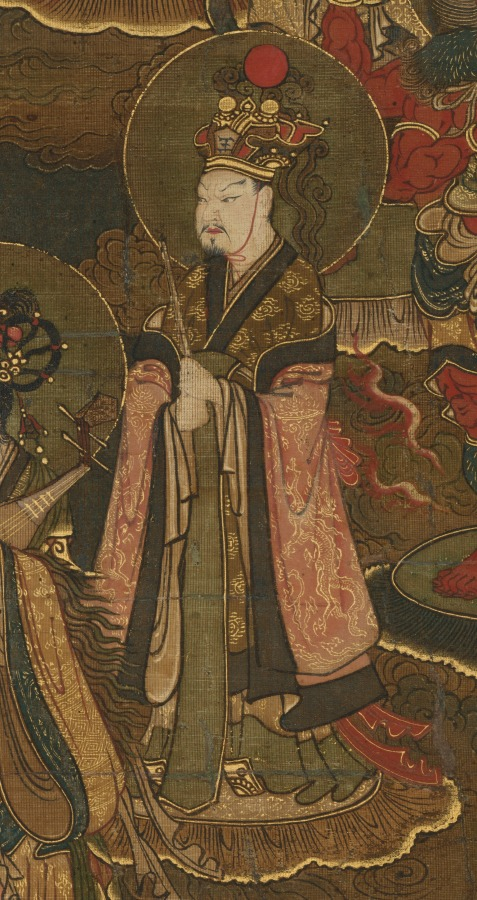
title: Descent of the Nine Luminaries and the Seven Stars at Kasuga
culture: Japan, Nanbokuchō period (1336–92)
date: mid- to late 1300s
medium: Hanging scroll; ink, color, gold and cut gold on silk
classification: Painting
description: This medieval religious painting shows celestial beings descending from the heavens into the Kasuga Shrine, a major religious site in Japan's ancient capital, Nara. The moon and the Kasuga mountain range appear in the uppermost portion of the painting, as does a red shrine entrance gate, or torii. In the upper part of the painting, figural representations of the stars in the constellation known as the Big Dipper in the West descend from right to left on cloud banks. In the lower part, the Nine Luminaries (Sanskrit: Navagraha) that emerged from the Vedic tradition—the sun and moon; the planets Jupiter, Mars, Saturn, Venus, and Mercury; and personifications of the fluctuating lunar nodes—descend in similar fashion. The painting uses the "deities in descent" scheme originating in China, as well as the original Buddhist form mandala (Japanese: honjibutsu mandarazu) format prevalent in medieval Japanese Shinto-Buddhist painting, to generate an image connected to the worship of celestial bodies in Esoteric Buddhism.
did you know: A 19th-century copy of this painting in ink and light color exists at the Kyoto City University of Arts.